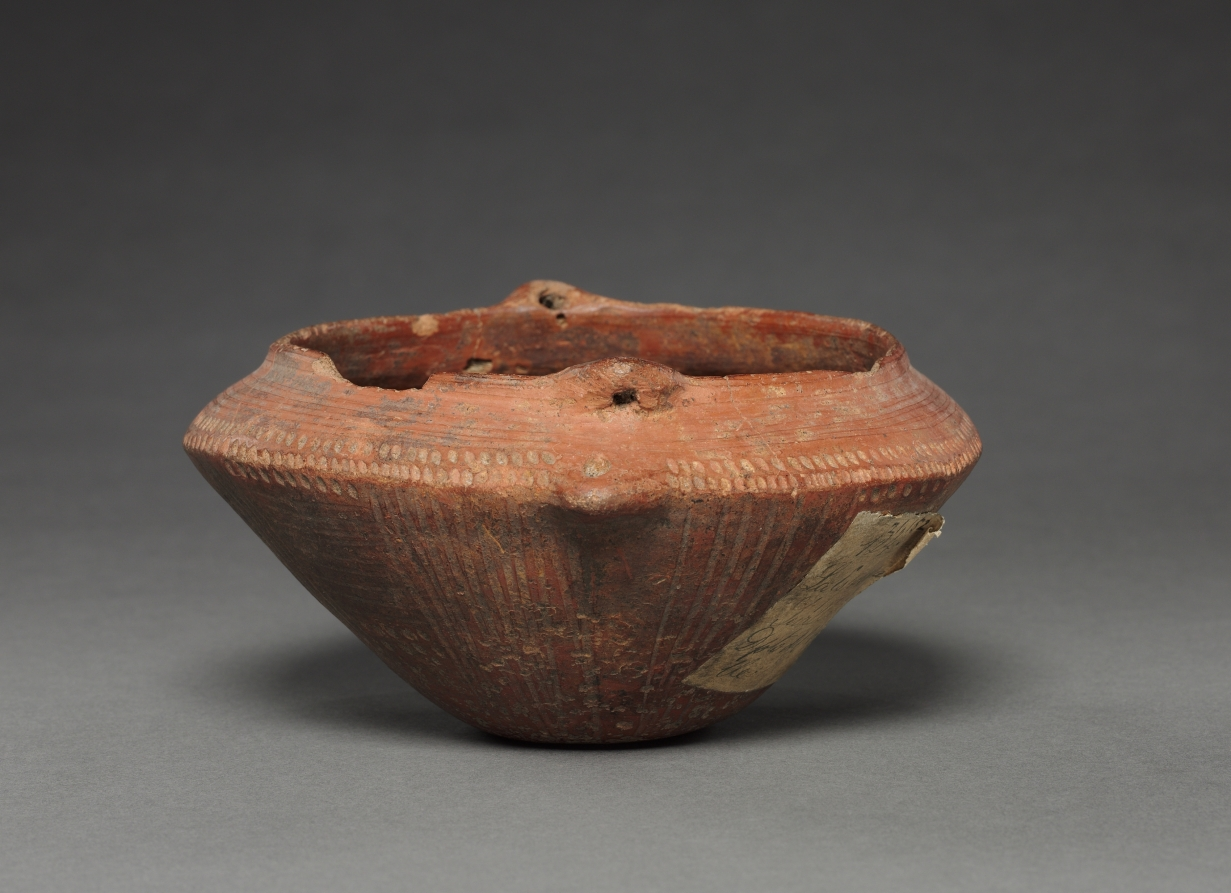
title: Dish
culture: Colombia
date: before 1550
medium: red ware with incised patterns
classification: Ceramic